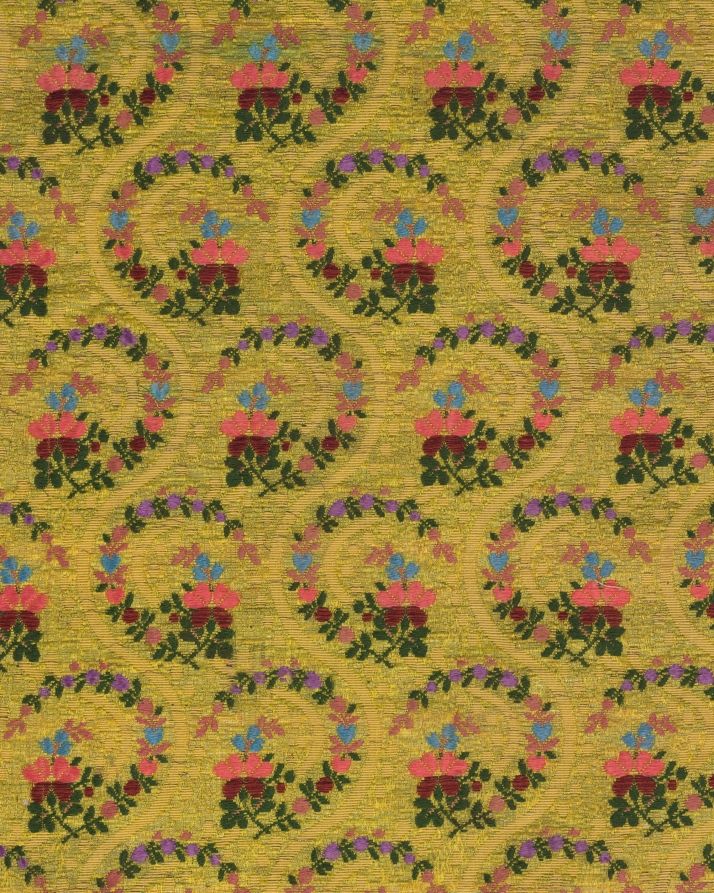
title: Two Loom Widths Sewn Together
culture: Iran, 19th - early 20th century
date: 1800s - early 1900s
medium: compound weave with silk and metal tread weft brocade; loom width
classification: Textile